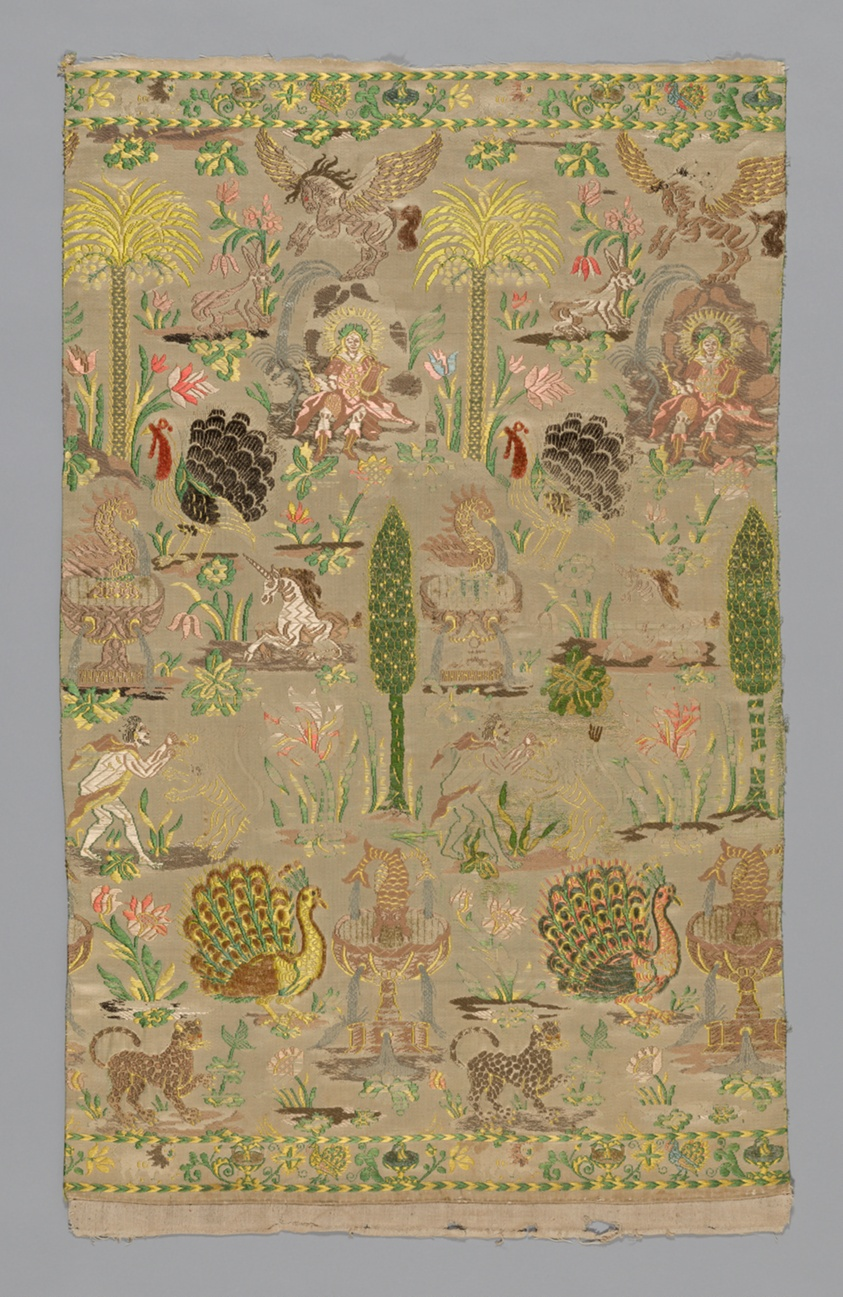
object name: Textile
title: Panel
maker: Italy for the Portuguese market or Portugal or Portugal for export to Macao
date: c. 1700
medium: Silk and silk chenille yarns, warp-float faced 7:1 satin weave with supplementary brocading wefts self-patterned by two-color complementary ground wefts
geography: Portugal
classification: textile; weaving